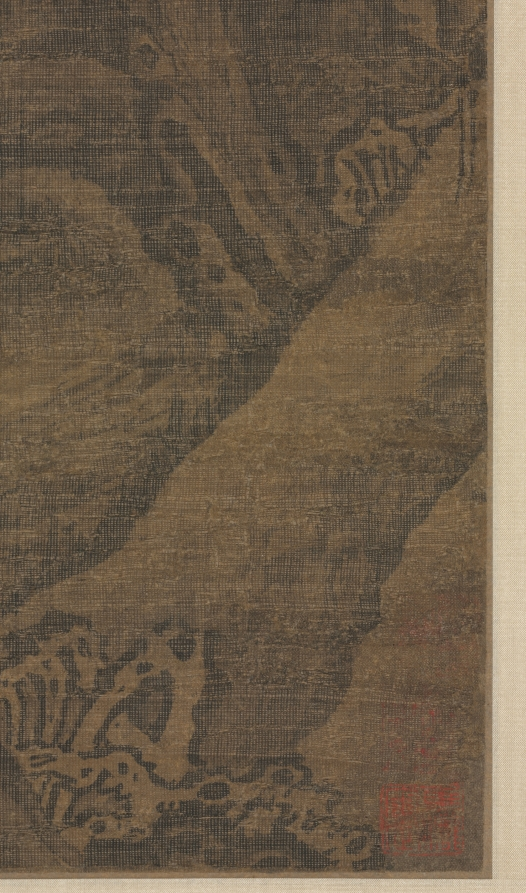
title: Waterfall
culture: China, Song dynasty (960-1279) - Yuan dynasty (1271-1368)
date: 1271–1368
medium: hanging scroll, ink and slight color on silk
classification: Painting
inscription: Label on the mounting with 2 seals of T'ang ? of Pi-ling (16th c.); label on back of mounting of Kü Kuang-hsü (1731-1797). 1 colophon and 8 additional seals: 1 colophon, dated 1625, and 2 seals of Kao P'an-lung (1562-1626); 2 seals of Liu Shu (1759-1816); 1 seal of Pi Lung (late 18th c.); 1 seal of Ts'ao tzu-wen; 2 seals unidentified. WKH